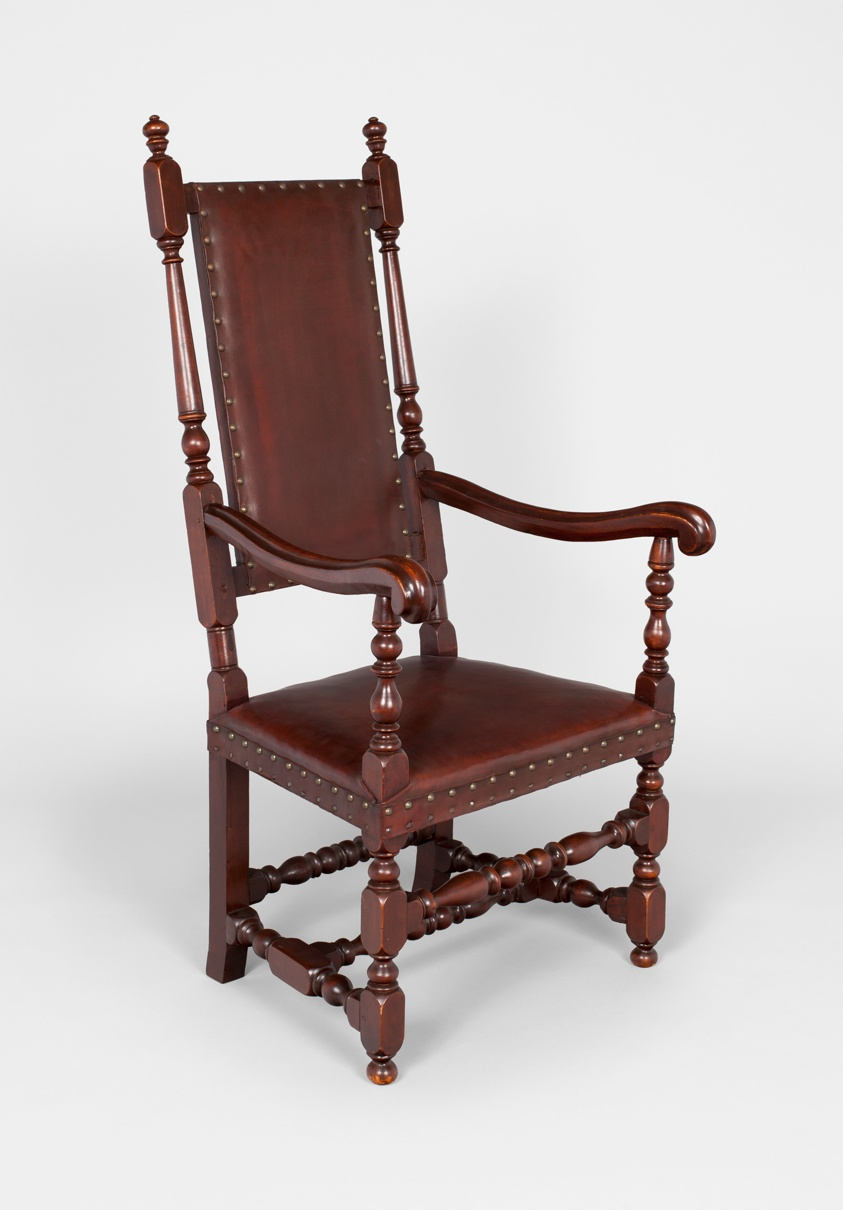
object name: Furniture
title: Armchair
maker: Artist unknown (American, 17th–18th century); Boston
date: 1690–1725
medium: Maple with leather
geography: Boston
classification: seating; furniture; american decorative arts; american arts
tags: furniture